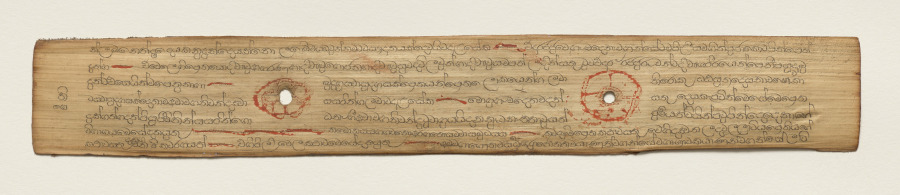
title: Leaf from a Buddhist Manuscript (recto)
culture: Sri Lanka, Singhalese, Late 17th century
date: c. 1700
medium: fiber paper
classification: Manuscript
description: Palm leaf material is still used for manuscripts in Sri Lanka. The palm leaves are prepared first by boiling them, drying them in the sun, and then rubbing them with oils. Scribes then use a metal stylus to incise the text. Then charcoal powder is wiped across the pages, filling in only the inscribed lines.